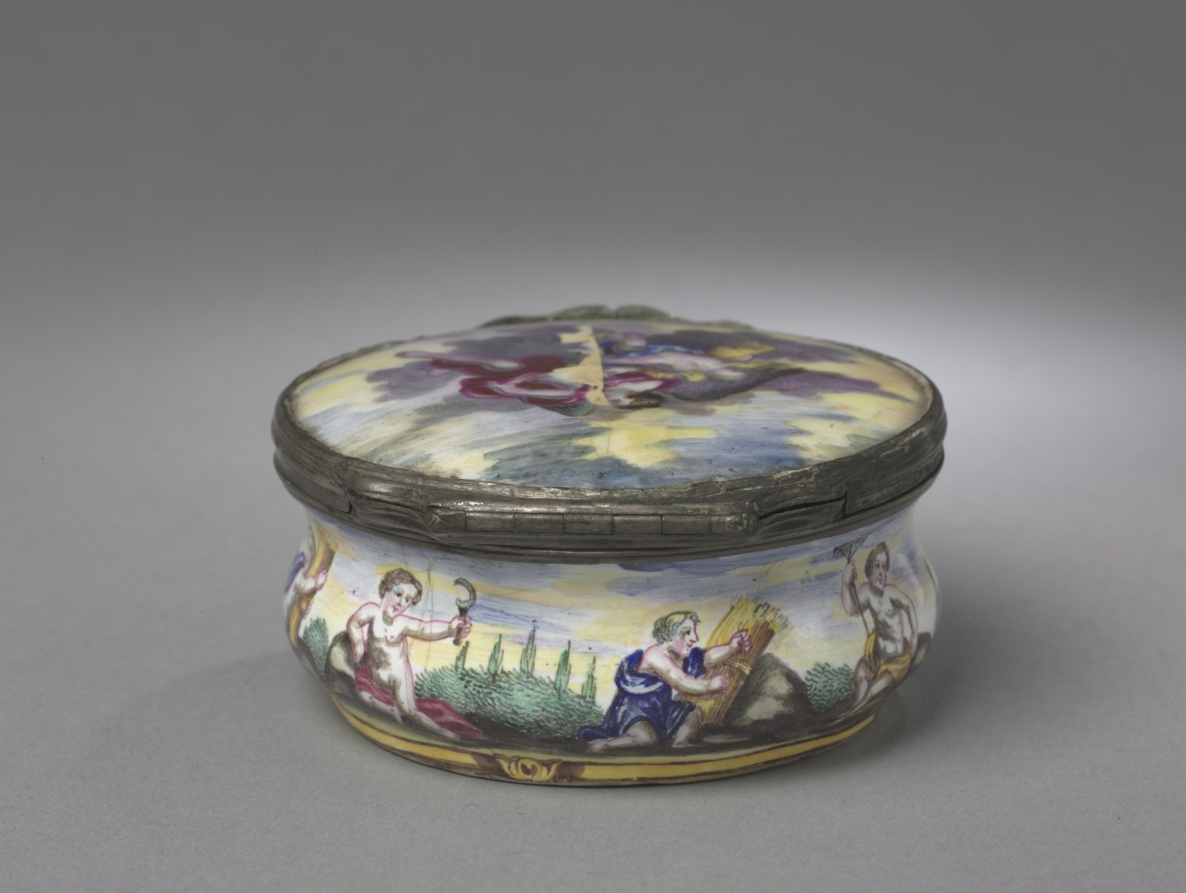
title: Box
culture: Italy or Germany, 18th century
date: 1700s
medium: enamel on copper, metal mounts with traces of gilding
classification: Miscellaneous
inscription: inside box appear the letters "FB" in monogram.